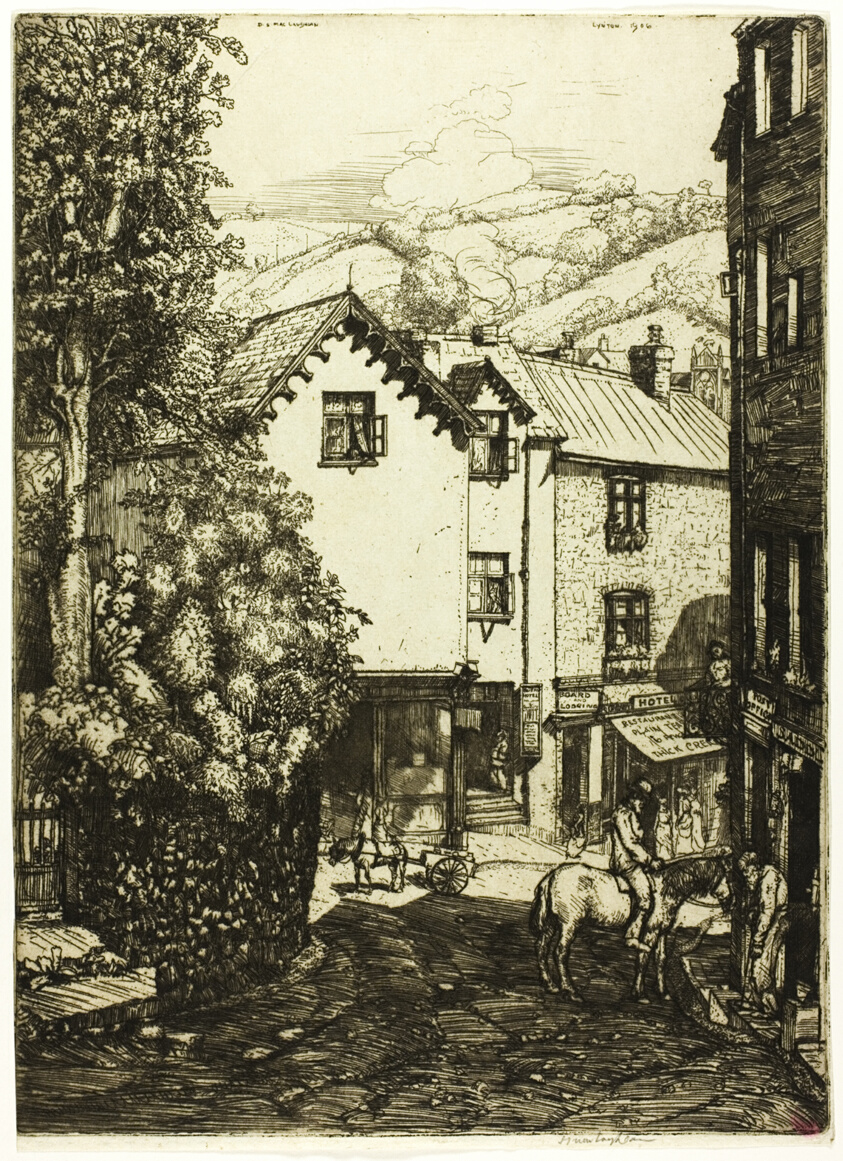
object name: Print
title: Lynton, England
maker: Donald Shaw MacLaughlan (American, born Canada, 1876-1938)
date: 1906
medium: Etching in black on cream laid paper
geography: United States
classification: etching; print; prints and drawing